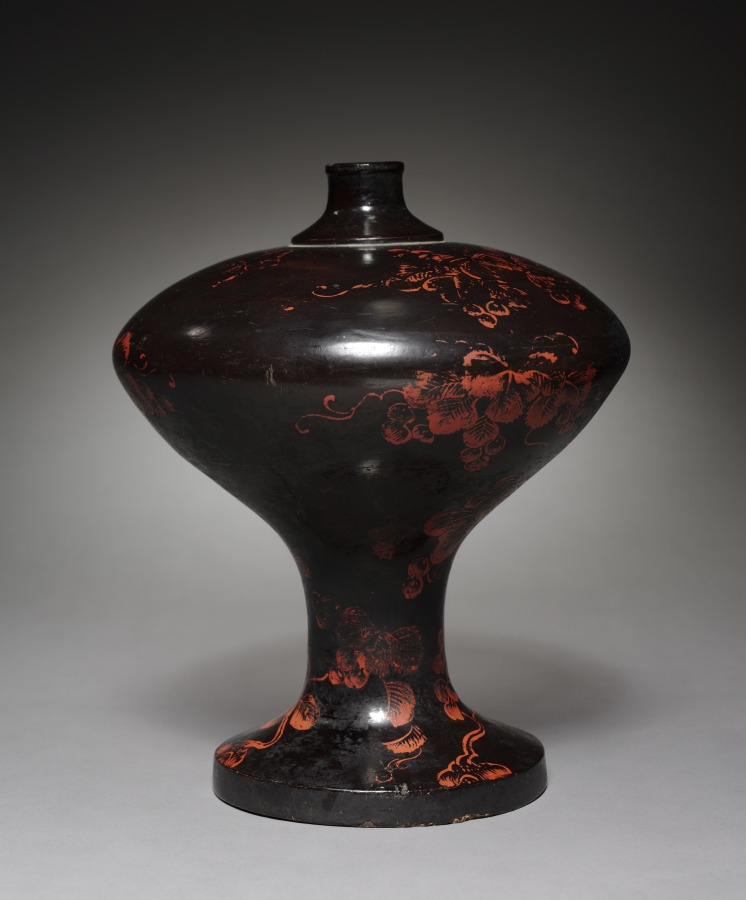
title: Sake Flask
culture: Japan, Muromachi period (1392–1573)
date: 1500s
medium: Black laquered wood with red lacquer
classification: Lacquer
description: This flask contained rice wine, or sake. Its wood body was shaped by a lathe before black lacquer was applied to the surface. A red lacquer design of grapevines, an auspicious motif, covers the surface. With their numerous, long-lasting fruits, grapevines traditionally symbolized fertility and longevity in East Asia.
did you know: The evocative imagery of brushed leaves and bunches of grapes suggest that the artist referred to a particular painting when decorating this vase.